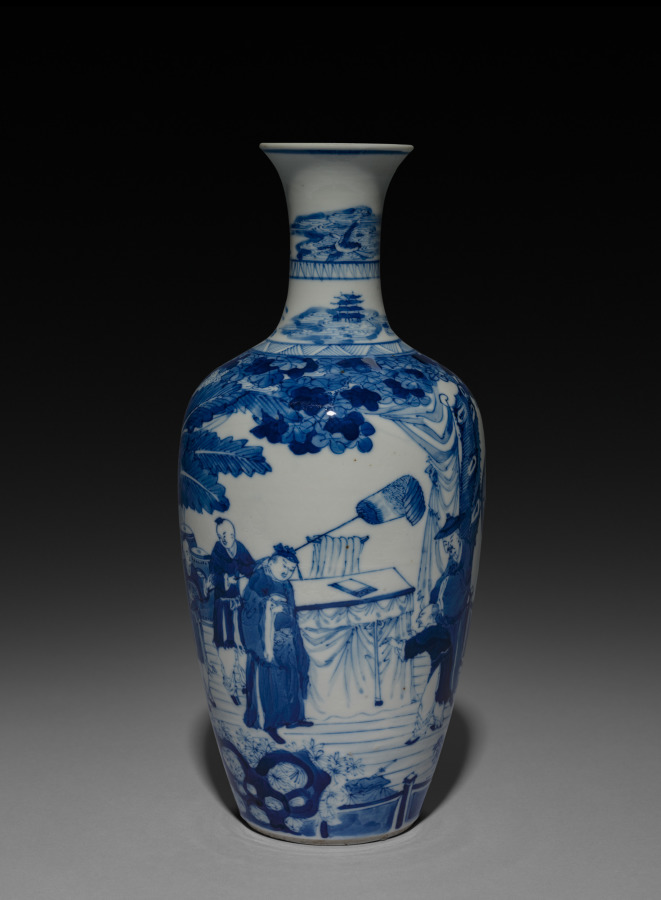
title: Vase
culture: China, Qing dynasty (1644-1911), Kangxi reign (1661-1722)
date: 1662–1722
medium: porcelain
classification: Ceramic